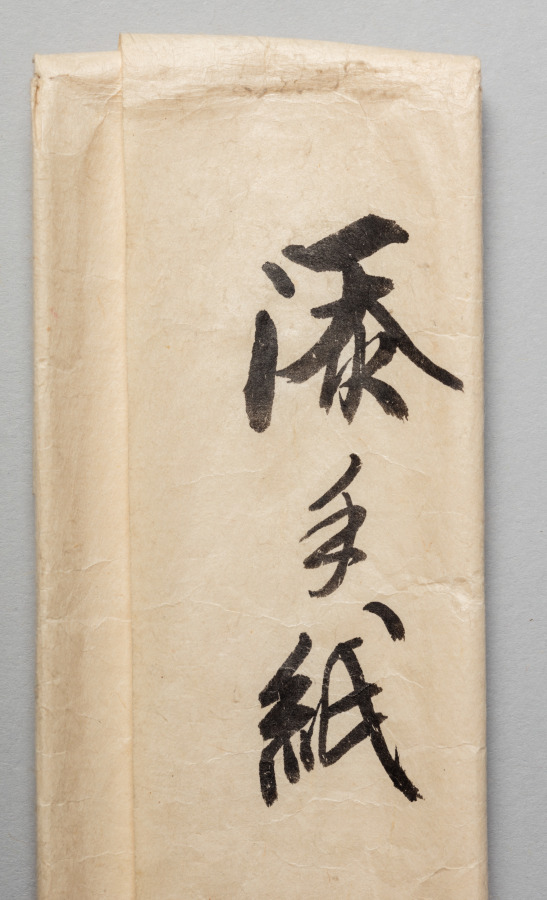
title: Landscape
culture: Japan, Muromachi period (1392–1573)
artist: attributed to Kenkō Shōkei (Japanese, active 1478–1506)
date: late 1400s–early 1500s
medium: hanging scroll, ink and light color on paper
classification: Painting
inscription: inscription above signed Shō'u Kojin; calligraphy by the Shokōji priest Tōgan Zuisen 桃源瑞仙 (1430–89)